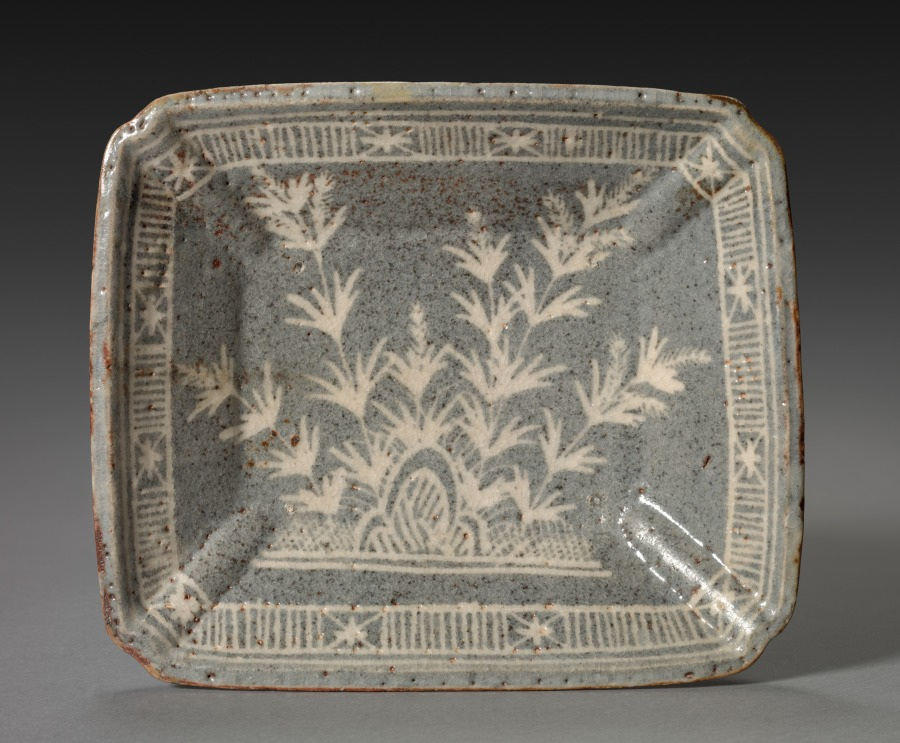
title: Dish with Autumn Grasses and Rocks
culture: Japan, Momoyama period (1573-1615) to Edo period (1615-1858)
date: late 1500s–early 1600s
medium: Stoneware with underglaze iron oxide slip and incised designs (Mino ware, Shino type)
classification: Ceramic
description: Mino ware is stoneware produced in the Mino area of present-day Gifu prefecture in central Japan. Works like this piece are called nezumi-shino, or “mouse-gray” Shino, after the glazing technique. The gray color and white design of grasses were achieved by applying an iron oxide slip to the surface and carving through it to the white clay, and then covering the whole surface in glaze and firing the object. In its design, this serving dish emulates Chinese ceramic prototypes, but its shape recalls wooden and lacquered trays commonly used in Japan at the time.